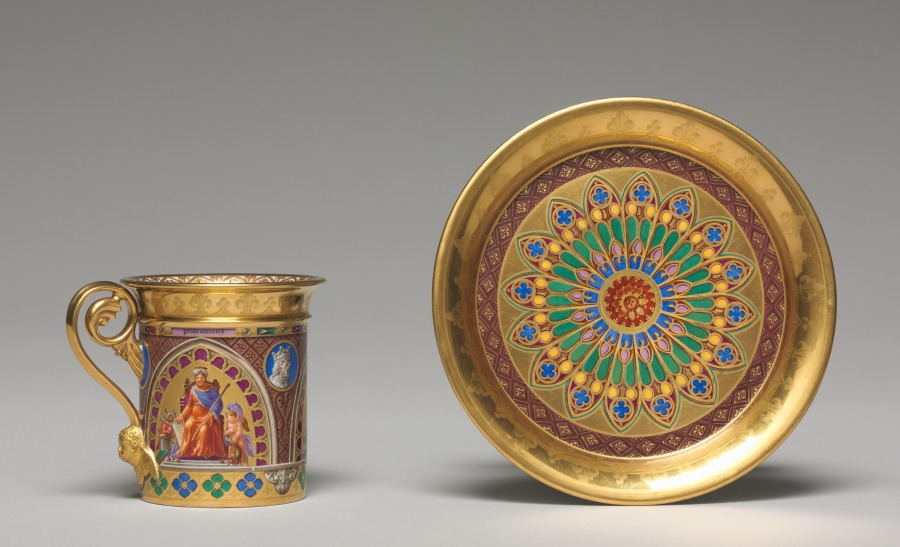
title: Cup and Saucer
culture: France, Sèvres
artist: Sèvres Porcelain Factory (French, est. 1756)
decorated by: Pierre Huard (French)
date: 1827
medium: porcelain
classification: Ceramic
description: The 19th-century decorator of this cup embellished it with motifs from different eras, including portrayals of three ancient Frankish or French kings, surrounded by later Gothic style decoration.